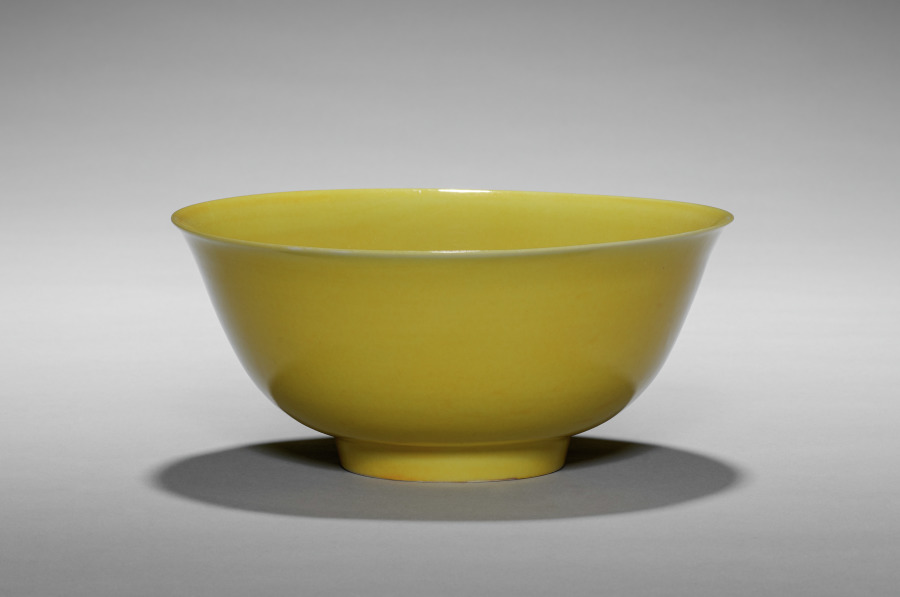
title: Yellow-Glazed Bowl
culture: China, Jiangxi province, Jingdezhen kilns, Ming dynasty (1368–1644), Zhengde mark and reign (1505–21)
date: 1505–21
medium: Porcelain with monochrome yellow glaze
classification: Ceramic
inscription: 大明正德年製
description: Monochrome yellow–glazed porcelain appears first during the Ming dynasty and is the combined result of technological advancement, the requirements of state rituals, and aspirations of taste. The base bears a mark of the Zhengde (正德) reign period, renowned for its high-quality imperial porcelain, and a pleasure-seeking emperor who died in his youth. Imperial marks were permitted to be applied only by Jingdezhen workshops affiliated with the court. Most scholars believe that yellow monochrome ware was reserved for the use of the imperial household or served as diplomatic gifts. The color is therefore often called “imperial yellow.”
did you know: Zhengde–marked bowls of this so-called imperial yellow type are also preserved in the National Palace Museum in Taipei and the Topkapi Saray, Istanbul, once the palace of the Ottoman sultans.